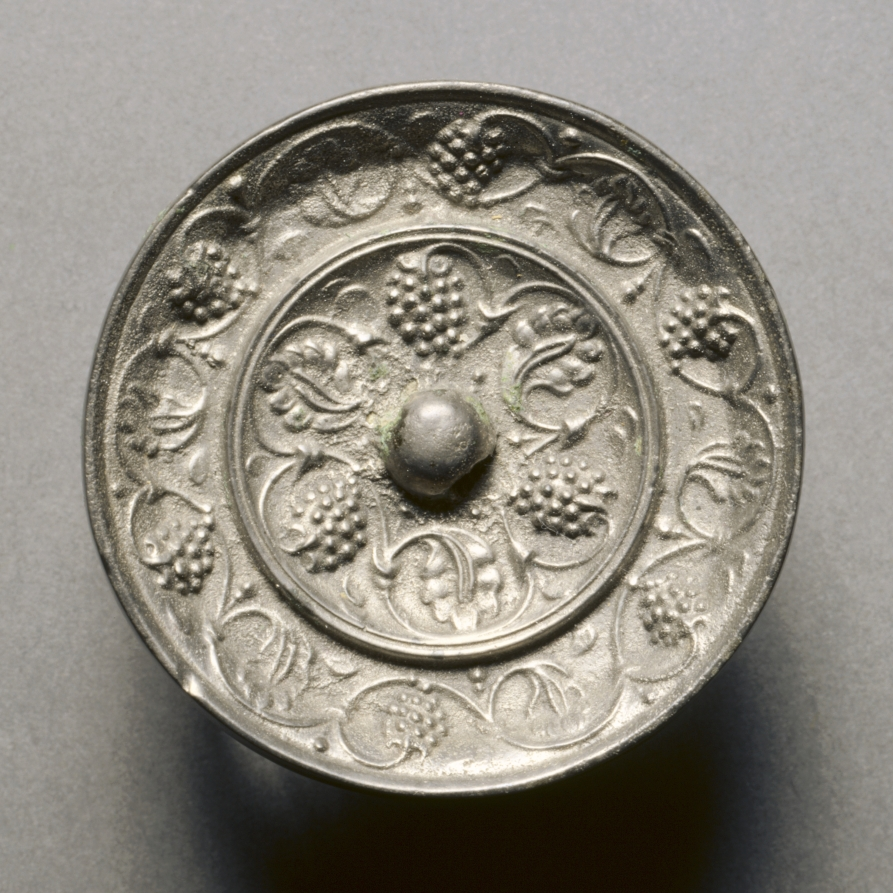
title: Miniature Mirror with Grape Decoration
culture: China, Tang dynasty (618-907)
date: 600s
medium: bronze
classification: Metalwork